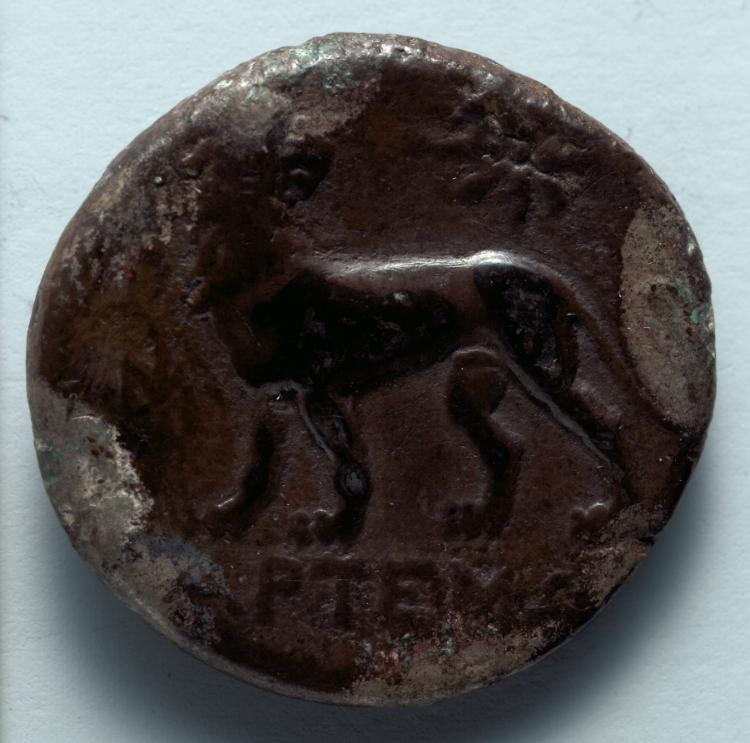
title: Tetradrachm: Lion (reverse)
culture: Greek, minted at Miletos (Ionia)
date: c. 334–323 BCE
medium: silver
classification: Coins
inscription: ΑΡΤΕΜΩ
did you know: The lion and star here connect to the sun god, Apollo, shown on the obverse.